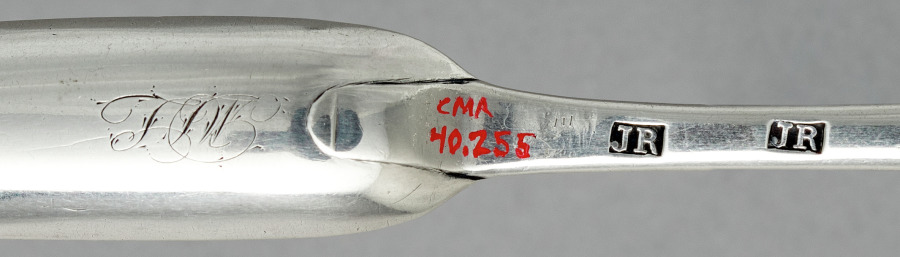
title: Marrow Scoop/Spoon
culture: America, Pennsylvania, Philadelphia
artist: attributed to Joseph Richardson (American, 1752–1831)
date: c. 1790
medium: silver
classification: Silver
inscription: engraved "MDL" in bright-cut script on back of larger scoop, and "E" in script on top of joint above smaller scoop.